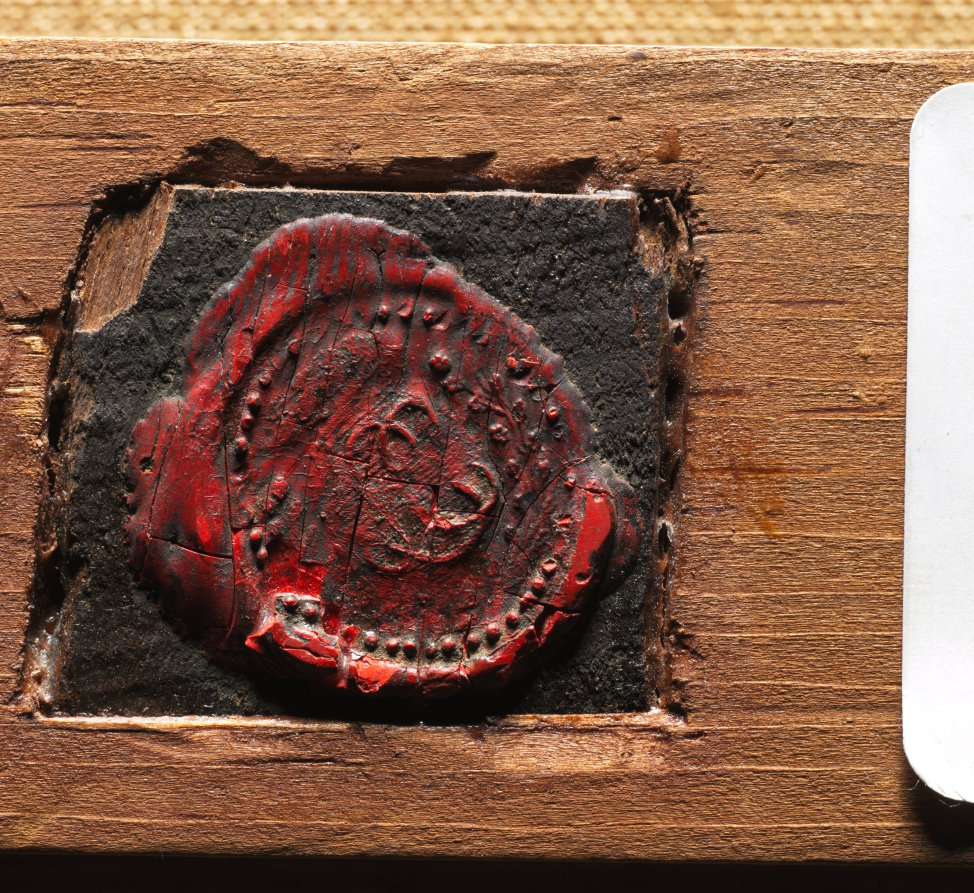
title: Head of a Young Woman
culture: France, 18th century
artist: François Boucher (French, 1703–1770)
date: early 1730s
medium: oil on canvas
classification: Painting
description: This work was catalogued as "style of Chardin" when it entered the museum's collection, and was considered a minor rococo revival work of the 1800s. In 2011, the museum asked Alastair Laing, the leading scholar of the artist Boucher, to study it. He confirmed that the painting is a rare survival from the artist's early career—one of only two known oil studies of this type by the artist.